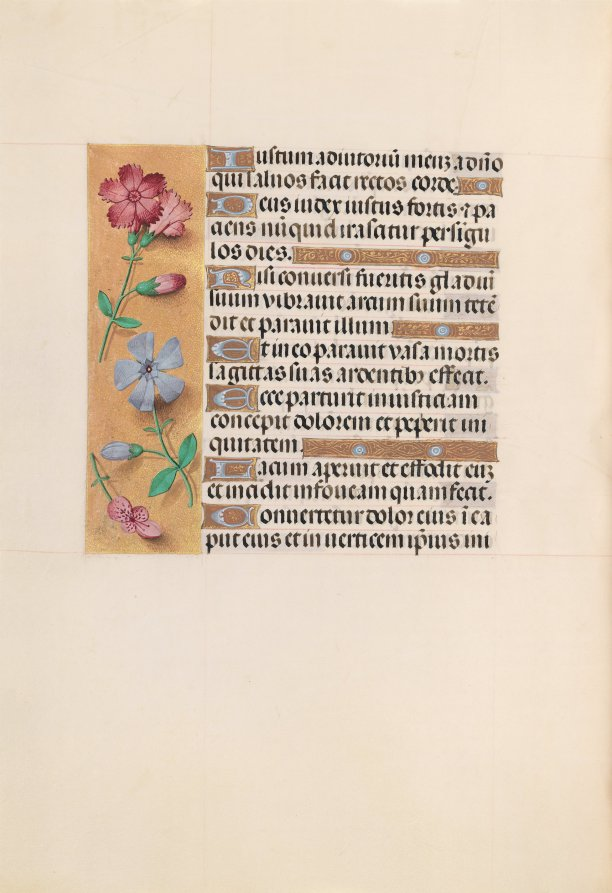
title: Hours of Queen Isabella the Catholic, Queen of Spain: Fol. 230v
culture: Flanders, Ghent and Bruges, late 15th century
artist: Master of the First Prayerbook of Maximillian (Flemish, c. 1444–1519)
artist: and Associates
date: c. 1500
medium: ink, tempera, and gold on vellum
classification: Bound Volume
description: This manuscript was illuminated by a circle of at least five highly organized manuscript painters active in the Flemish cities of Ghent and Bruges. The principal illuminator was Alexander Bening, who painted the majority of the book's miniatures. Manuscripts produced by this circle of artists are renowned for the decoration of their borders, which typically feature a rich variety of realistically-painted flowers, birds, and butterflies. This prayer book, called a book of hours, was intended not for a cleric, but for the private devotions of a lay person-in this case, Isabella the Catholic, Queen of Spain (1451-1504). Isabella's coat of arms embellishes the book's frontispiece. It is unlikely that the book was commissioned by the Queen herself; rather, she probably received it as a diplomatic gift from someone courting her patronage, perhaps Cardinal Francisco Jimenez de Cisneros. A Franciscan friar, Jimenez was dependent upon Isabella for his advancement, first to the post of Queen's confessor in 1492, and then to Archbishop of Toledo in 1495.